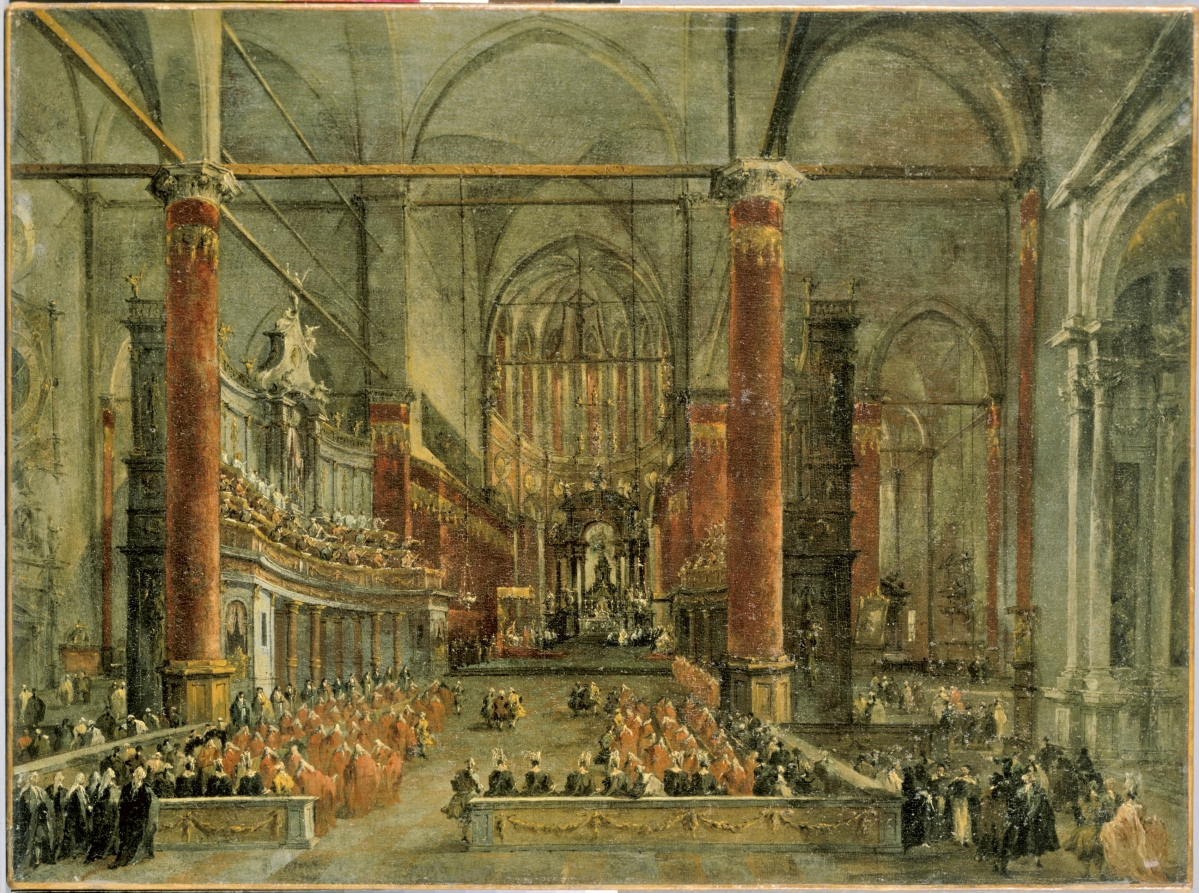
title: Pontifical Ceremony in SS. Giovanni e Paolo, Venice, 1782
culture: Italy, 18th century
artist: Francesco Guardi (Italian, 1712–1793)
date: c. 1783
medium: oil on canvas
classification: Painting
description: The second scene in the series depicts Pius VI celebrating mass in the Basilica of Santi Giovanni e Paolo, one of the largest churches in Venice and the pope’s residence during his stay. The mass included a performance of the Te Deum, a prayer of thanksgiving set to music by the Venetian composer Antonio Vivaldi (1678–1741). Traditionally, the Te Deum was recited in thanks to God for a special blessing, including a papal election or a royal coronation, and thus was appropriate for this historic papal visit.